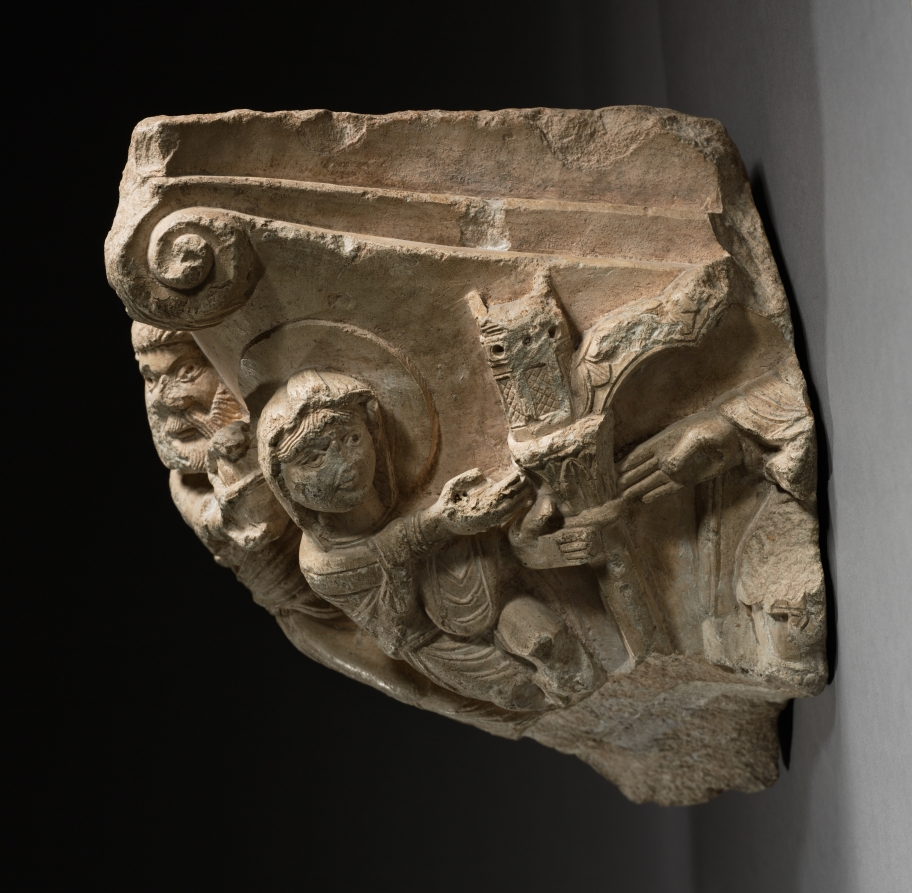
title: Fragment of a Capital with Scenes from Mary’s Infancy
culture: South Italy, Apulia, early 12th Century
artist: workshop of The Cathedral of Monopoli (Italian)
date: early 1100s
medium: fine-grained limestone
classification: Sculpture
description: This sculpture relates stylistically with architrave figures from the facade of Monopoli’s cathedral. It is especially similar to a capital there featuring the prophet Daniel. The figure pouring water on the left probably represents an attendant in the Birth of the Virgin. The remaining figures depict the subject of the Presentation of the Virgin in the Temple. Their exquisite sculptural character gives this fragment major importance in the study of Romanesque sculpture in Apulia.